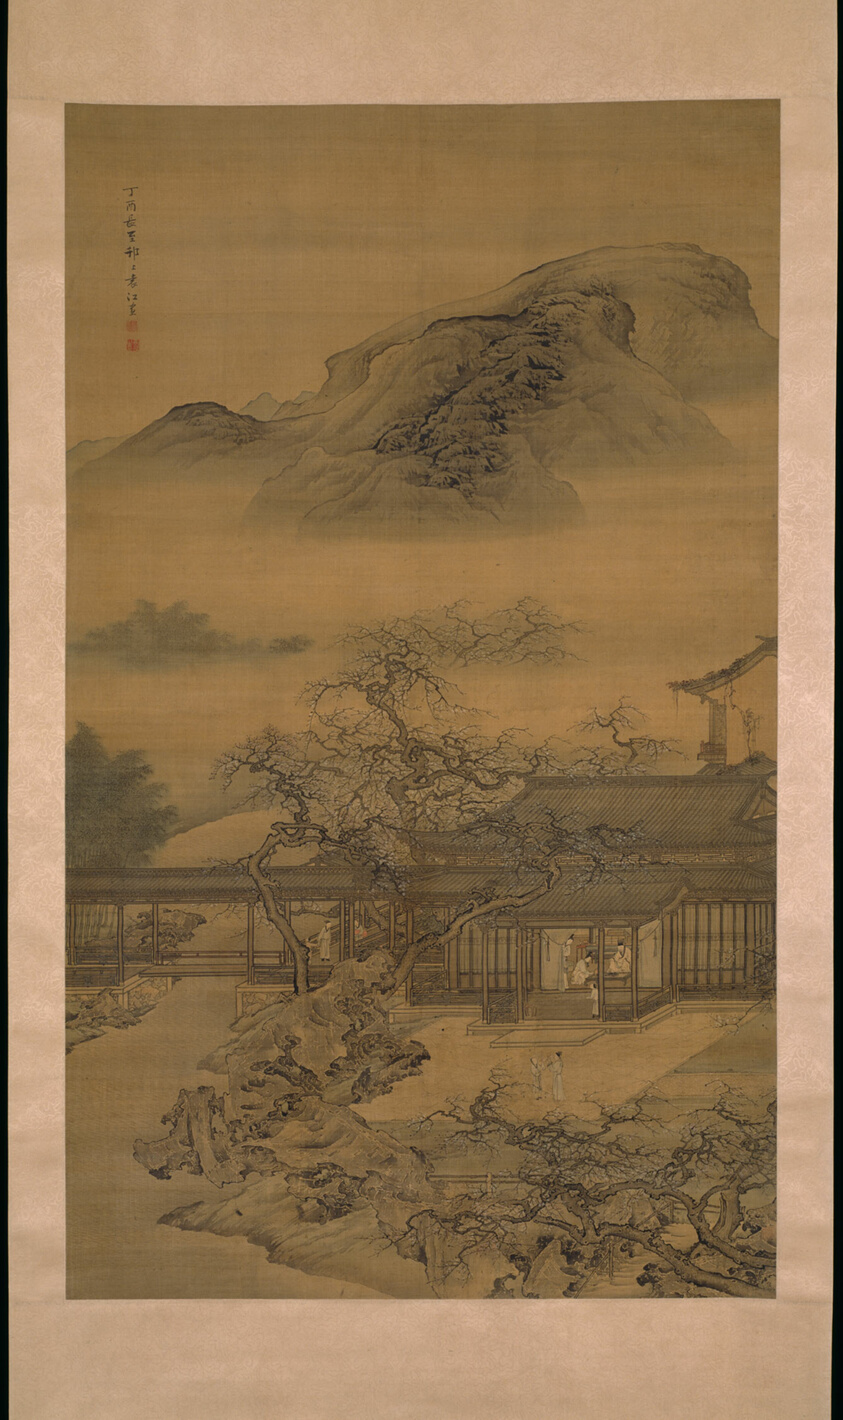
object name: Painting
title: Spring Arriving in the Han Palace 漢宮春曉圖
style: Chinese (culture or style)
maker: Yuan Jiang 袁江 (Chinese, active c. 1690–1724)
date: Qing dynasty (1644–1911), 1717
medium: Hanging scroll; ink and slight color on silk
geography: China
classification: hanging scroll; painting; asian art